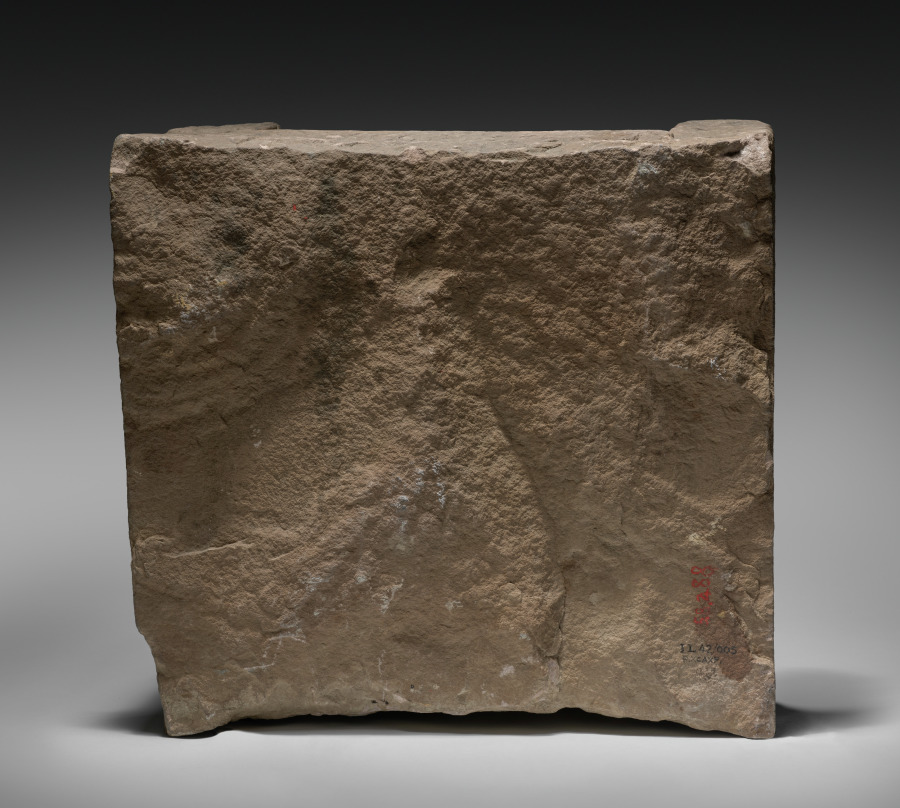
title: Eight Armed Shiva Dancing Between Two Pillars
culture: India, Rajasthan, Chandela Dynasty, 10th - 11th century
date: 900s–1000s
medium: sandstone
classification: Sculpture